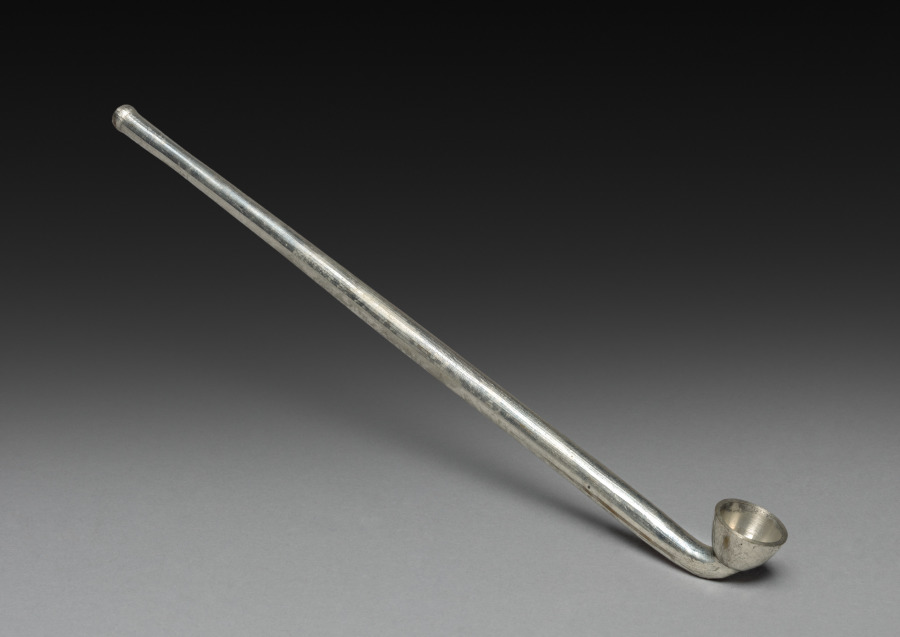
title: Tobacco Pipe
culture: Japan, Meiji period (1868–1912)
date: late 1800s–early 1900s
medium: metal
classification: Miscellaneous